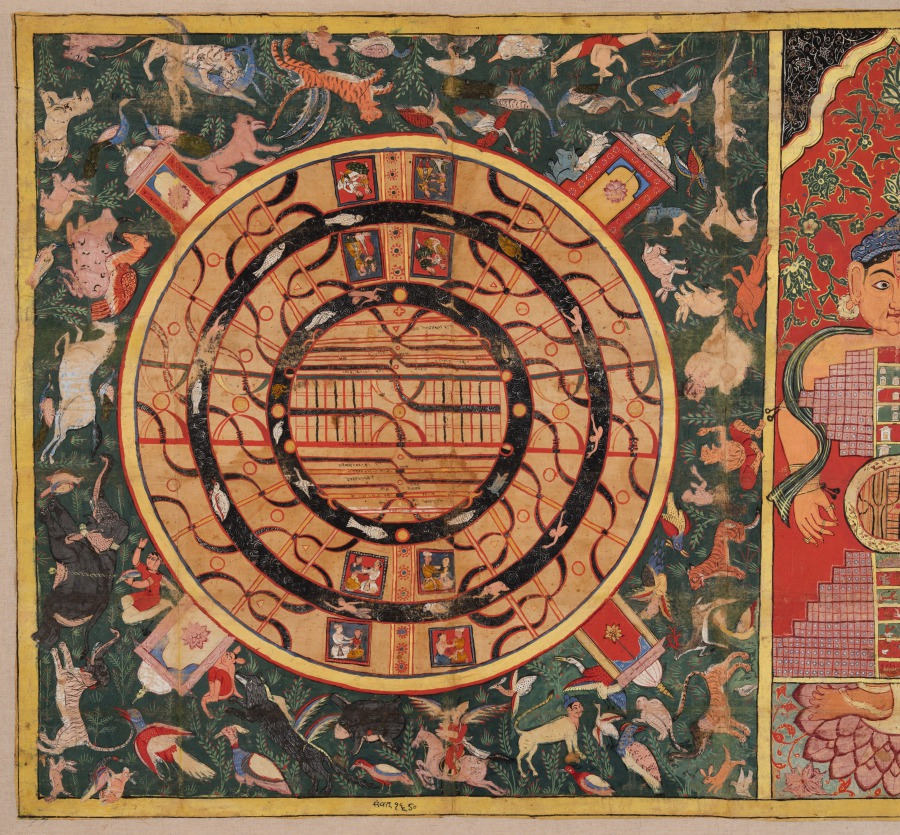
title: Diagrams of the Universe: The Two-and-a-Half Continents, the Universe in the Shape of a Person, and the Seven Levels of Hell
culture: Western India, Gujarat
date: 1613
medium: Gum tempera, ink, and gold on cloth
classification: Painting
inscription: saṃvat 1670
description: According to Jain cosmology, the universe is envisioned in the shape of a man. Above the waist are seven levels of heavens; below the waist are seven levels of hell. His midsection is the earthly realm, here shown as a round diagram with mountains and rivers, expanded at the left. The hell scenes are elaborated at the right.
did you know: The seven levels of hell depict various punishments as per Jain mythology.